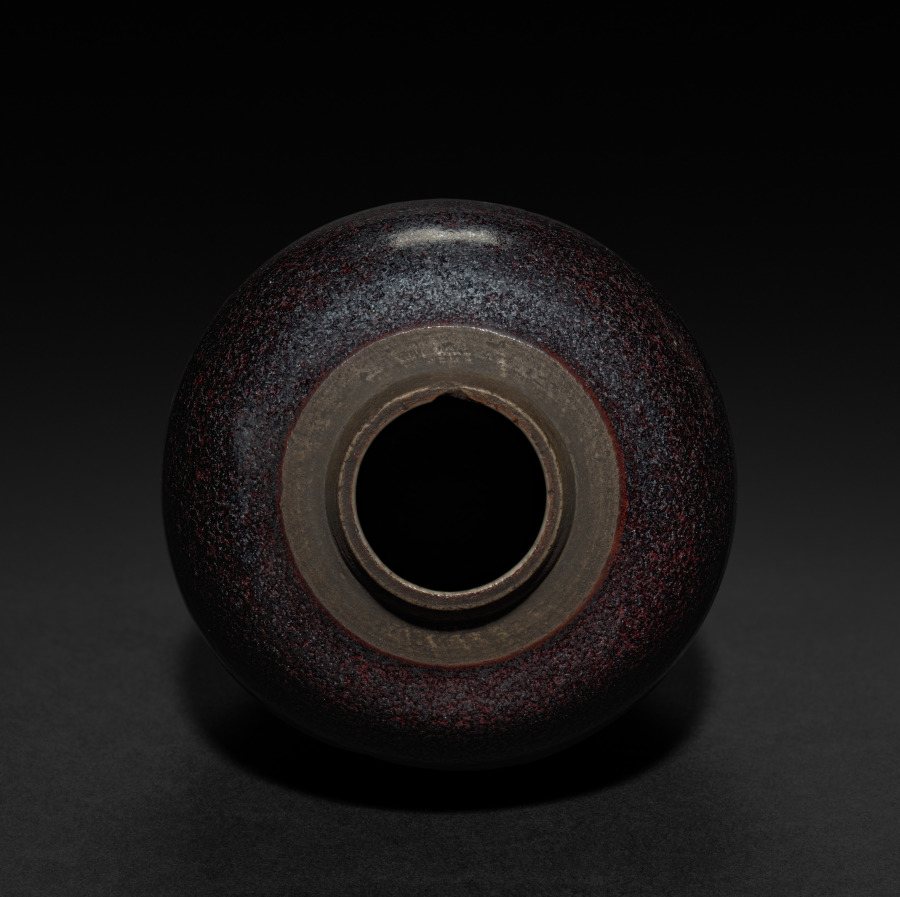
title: Jar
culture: China, Qing dynasty (1644–1911), Qianlong reign (1736–95)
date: 1736–95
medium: porcelain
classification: Ceramic